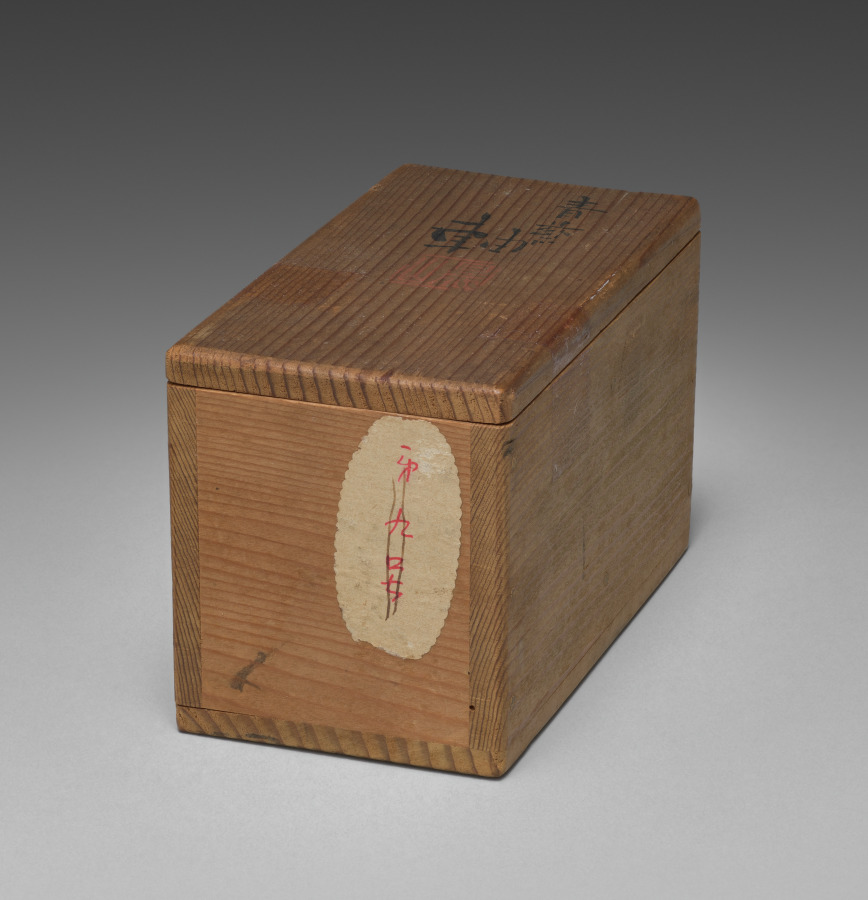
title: Roller Ends for Hanging Scroll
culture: Japan, Meiji period (1868–1912)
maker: Seifū Yohei III (Japanese, 1851–1914)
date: 1893–1914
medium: Pair of hanging scroll roller ends; porcelain with green glaze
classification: Ceramic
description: Before entering into his apprenticeship with Yohei II, Seifū Yohei III trained as a painter in Osaka. He continued to paint throughout his career as a ceramist. As part of his ceramic practice, Yohei III also made roller ends to be placed at either end of the wooden dowel around which the lower part of a hanging scroll mounting is wrapped. These served both as weights for the painting and as knobs for handling it when rolling and unrolling. The pair here is made of porcelain with a green glaze.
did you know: These are the roller ends for the hanging scroll by Seifū Yohei III, Rain Clearing over a Summer’s Mountain, CMA 2022.151.